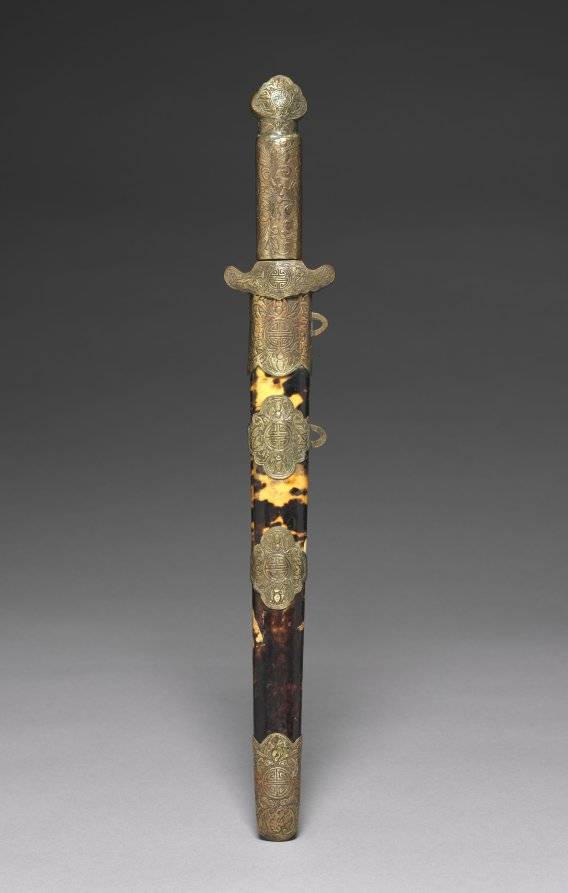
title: Dagger and Scabbard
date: 1800s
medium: metal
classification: Arms and Armor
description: This is a typical 19th-century dagger and scabbard. The material and decoration were carefully chosen for their symbolic meaning. For example, tortoise shell was chosen as the main material for the scabbard for its association with the legend of ancient heroes, while bats, the main decorative element of the brass mount, symbolize longevity and happiness.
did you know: In traditional East Asian art, bats, used here as a decorative element of the brass mount, symbolize longevity and happiness.